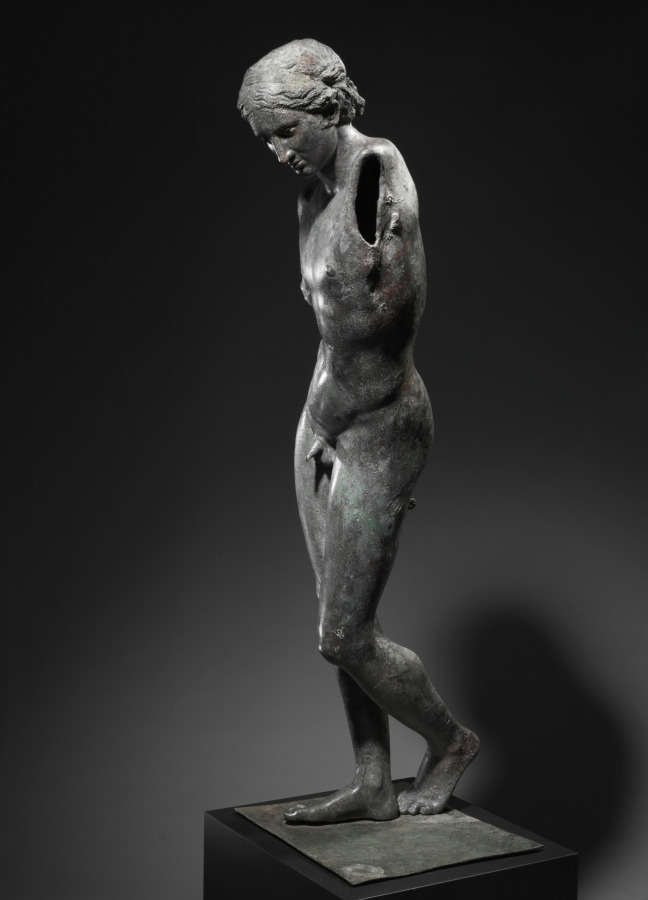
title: The Cleveland Apollo: Apollo Sauroktonos (Lizard-Slayer) or Apollo the Python-Slayer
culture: Greece, Athens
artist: attributed to Praxiteles (Greek, Athenian, c. 400–330 BCE)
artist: or Follower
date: c. 350–200 BCE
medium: bronze, copper and stone inlay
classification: Sculpture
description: The Cleveland Apollo was cast in multiple sections using the indirect lost-wax technique. First, molds were taken from a working model (now no longer known or preserved), which was then reproduced in hollow wax sections, each filled with a clay core. After details were added to the wax models, each was encased in clay. Then, the wax was heated, melted out, and replaced by molten bronze. Once cooled, the hollow bronze sections were fused together and finished, patching flaws and adding inlays and other details. Since the initial model was retained, it could be reused, allowing ancient sculptors to create multiples and variations of favorite works. Thus, remarkably, the Cleveland Apollo may once have been one of several such works. The consistently thin walls of the Cleveland Apollo (mostly 5-6 mm thick), together with the nearly invisible joins between most cast sections, show that it was created by highly skilled sculptors and foundry workers. Close looking reveals several noteworthy features. First, ovals atop the right foot mark a fusion weld, where molten bronze pooled to join separately cast sections. Second, small rectangular bronze patches cover parts of the surface (especially the right hip), each carefully cut and then hammered into place over holes or other casting defects. Inlaid lips, nipples, and eyes (the right ancient stone, the left now a modern replacement) added to the lifelike appearance of the sculpture, contrasting with the once bronze-colored skin. Finally, radiography helps to illuminate hidden features, such as the cast edge of the neck of Apollo.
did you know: Ovals across the top of the right foot show a clear join between separately cast sections.